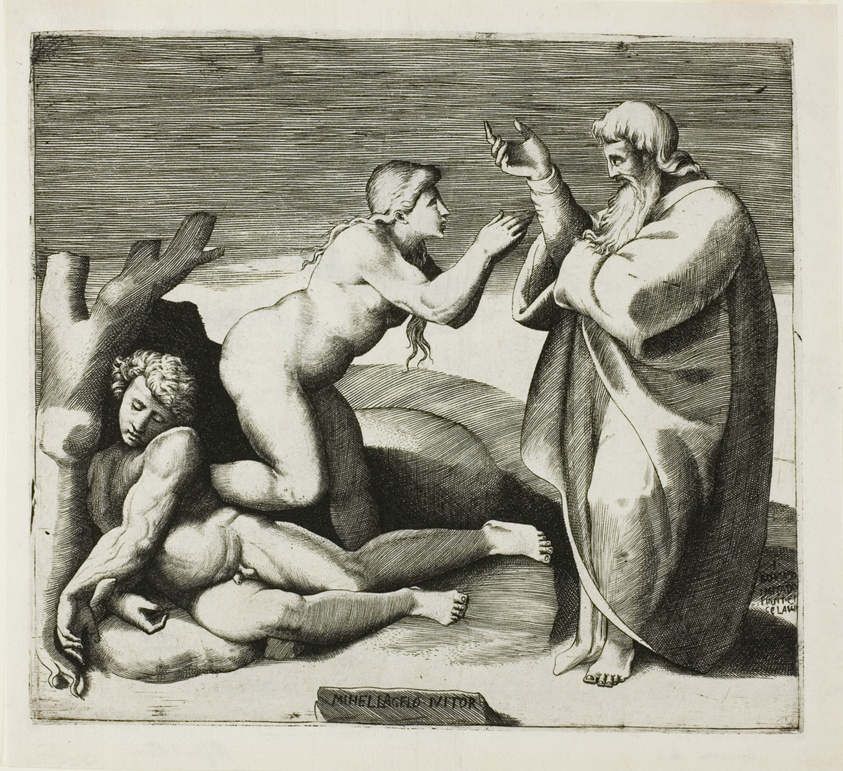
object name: Print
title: The Creation of Eve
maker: Giulio Bonasone (Italian, c. 1510–after 1576); after Michelangelo Buonarroti (Italian, 1475-1564)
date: 1540/45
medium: Engraving printed in black on paper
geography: Italy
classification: engraving; print; prints and drawing